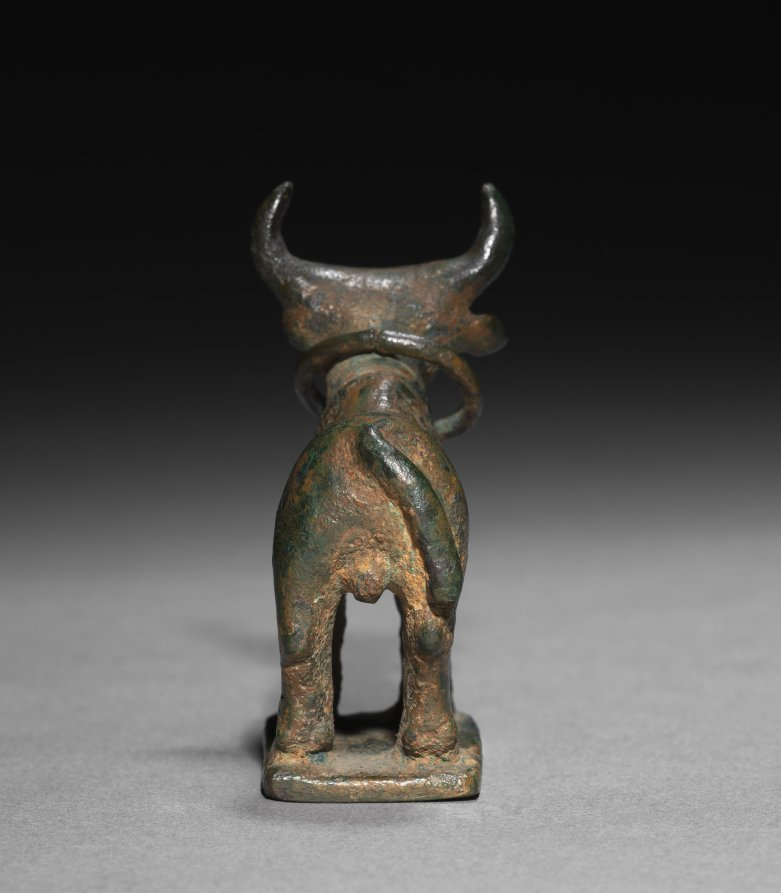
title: Statuette of a Bull with Curved Horns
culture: Egypt(?)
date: late 2000s BCE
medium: bronze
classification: Sculpture